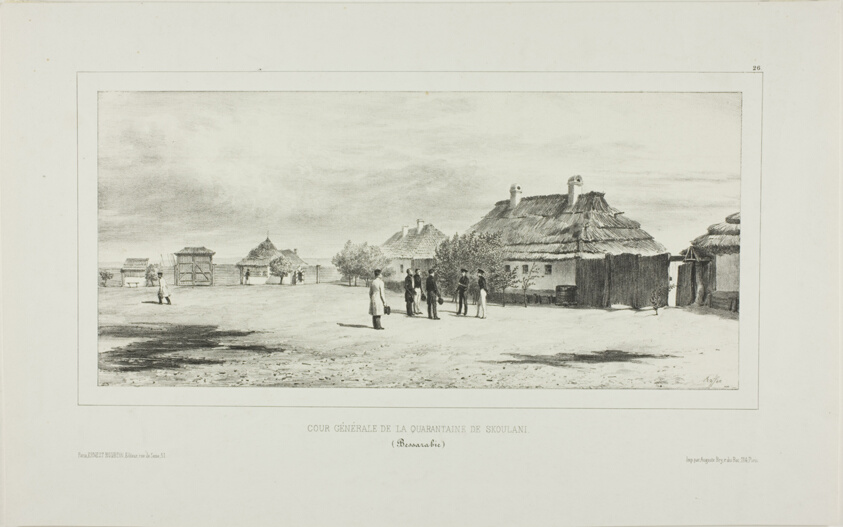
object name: Print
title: Courtyard of the Quarantine General, Skoulani, Bessarabia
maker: Denis Auguste Marie Raffet (French, 1804-1860); printed by Auguste Bry (French, 19th century); published by Éditeur Ernest Bourdin (French, active 19th century)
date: 1839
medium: Lithograph in black on ivory chine laid down on ivory wove paper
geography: France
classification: lithograph; print; prints and drawing